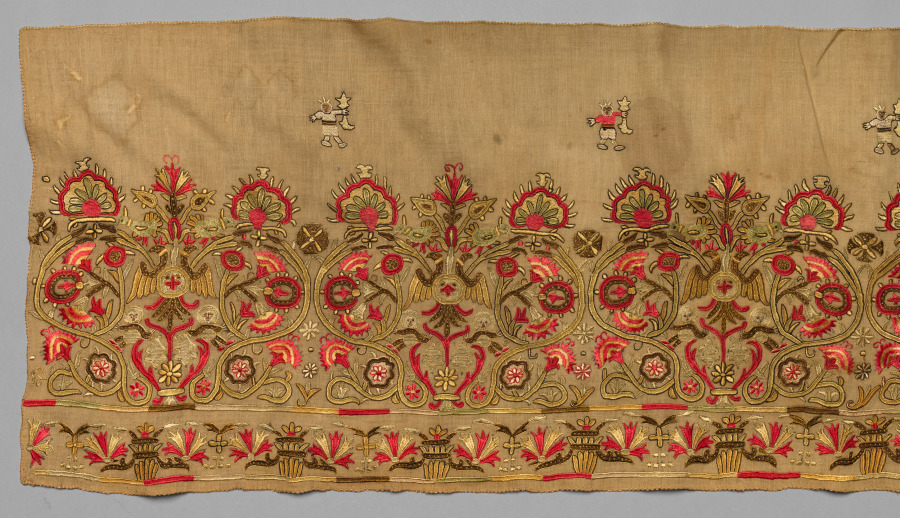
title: Complete Skirt Border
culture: Greece, Crete, 18th century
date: 1700s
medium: embroidery: silk on linen tabby ground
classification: Embroidery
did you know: Above the repeating floral motifs stand six small, evenly spaced figures wearing crowns and carrying maces.